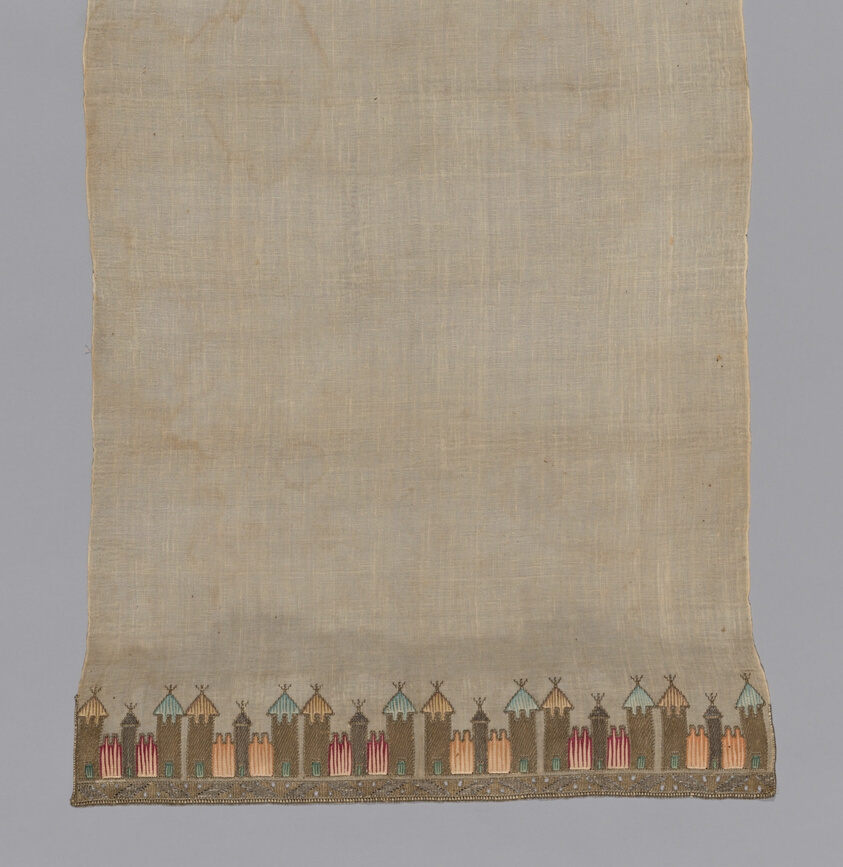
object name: Textile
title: Towel or Napkin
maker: Turkey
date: 19th century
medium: Embroidered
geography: Turkey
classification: textile; weaving; needlework (visual works)